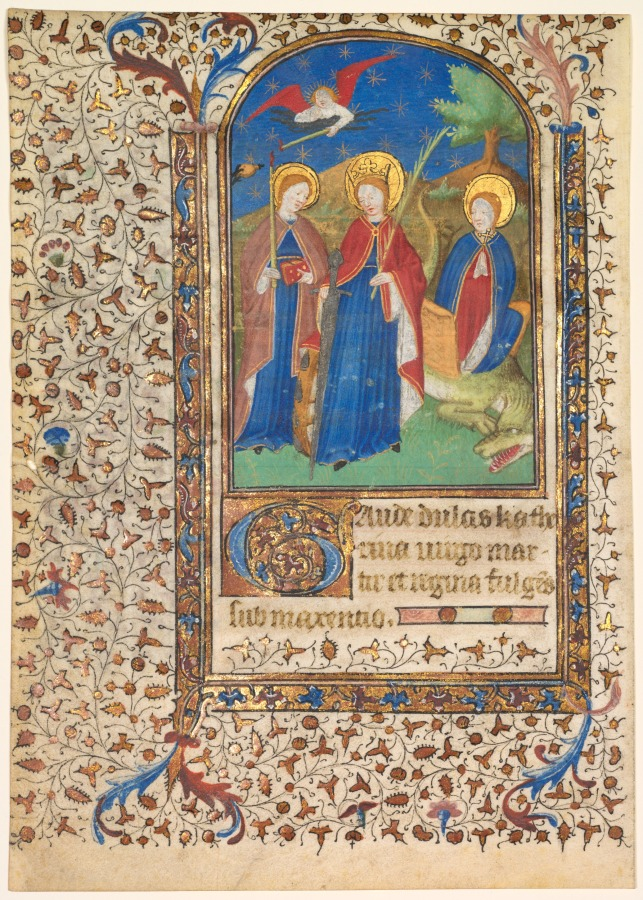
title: Leaf from a Book of Hours: Sts. Geneviève, Catherine of Alexandria, and Margaret (recto)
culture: France, Paris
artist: workshop of Boucicaut Master (French, Paris, active about 1410–25)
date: c. 1415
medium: ink, tempera, silver, and gold on vellum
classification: Manuscript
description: This leaf’s illumination includes Saints Geneviève, Catherine of Alexandria, and Margaret, all early church saints, virgins, and martyrs. During the 1400s and 1500s, the popularity of female saints increased, as did the literacy rate among women, thanks to books of hours. Saint Genevieve is shown with a candle the devil is trying to extinguish while an angel relights it. Saint Catherine, in the center, holds a palm branch and a sword, with which she was executed. Saint Margaret stands on the dragon from whom she emerged clean and unharmed when the cross she carried irritated the dragon’s innards.